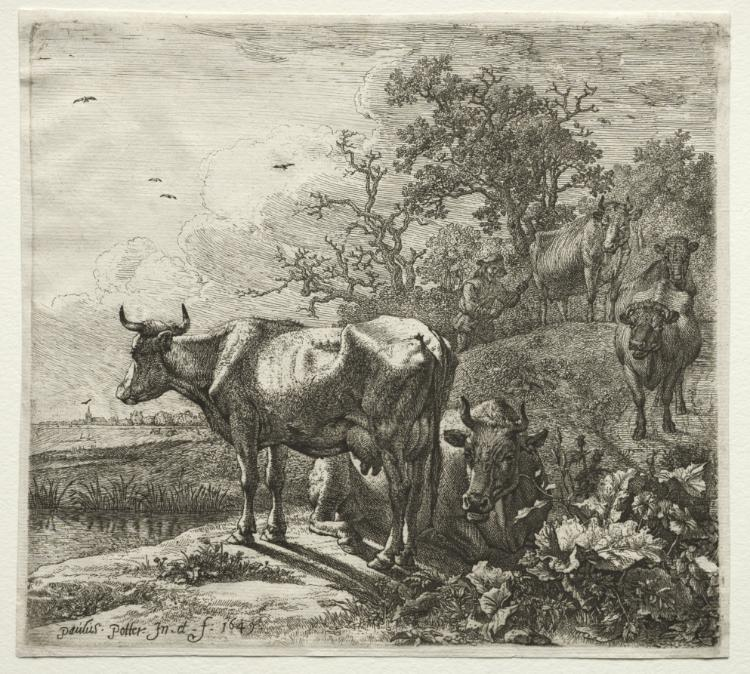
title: The Cowherd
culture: Netherlands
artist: Paulus Potter (Dutch, 1625–1654)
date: 1649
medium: etching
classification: Print